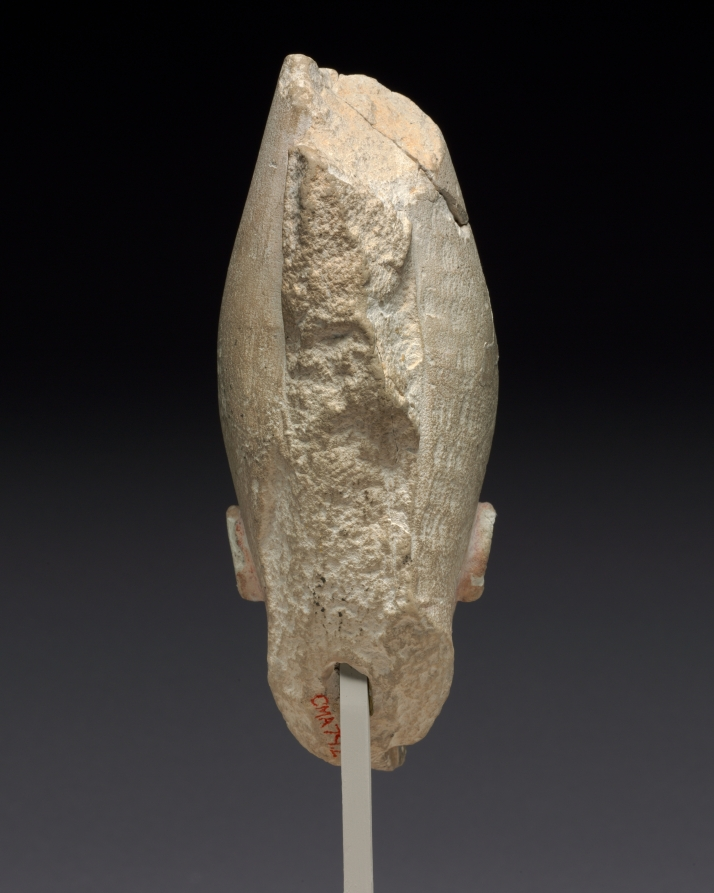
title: Head of King Userkaf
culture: Egypt, Old Kingdom (2647–2124 BCE), Dynasty 5, reign of Userkaf (2496–2491 BCE)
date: c. 2454–2447 BCE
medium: painted limestone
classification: Sculpture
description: Despite the monumental achievements of the Old Kingdom’s Pyramid Age, few images of its rulers survive. This head has been identified as King Userkaf, the first king of Dynasty 5. Userkaf built a modest pyramid at Saqqara and a temple to the sun god Ra at Abusir. According to later tradition, the first three kings of Dynasty 5 were the children of Ra himself and a mortal woman. From Userkaf’s reign on, the kings of Egypt were called "Sons of Ra." Here, Userkaf wears the two basic items of regalia that identify him as king: the tall, conical White Crown of Upper (southern) Egypt, and the royal false beard.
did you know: Visible chisel marks on the side of the crown imply that another figure once stood to the king's right; only a god or goddess could have stood in this prominent position.